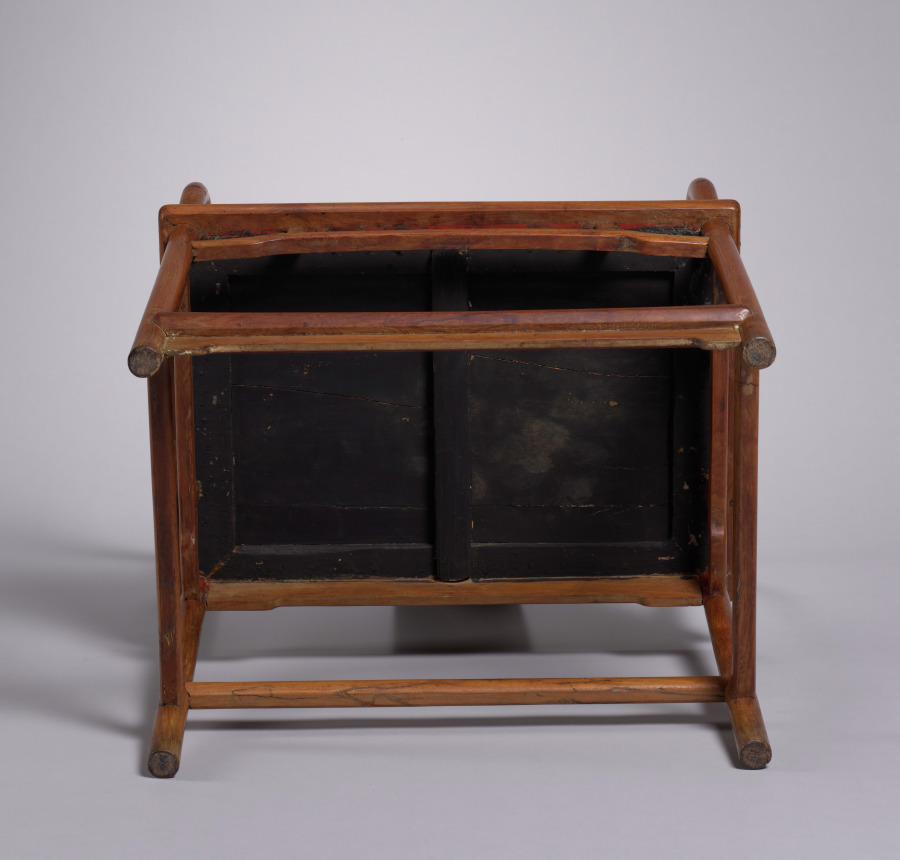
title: Roundback Armchair: Lohan Type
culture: China, Ming dynasty (1368–1644) to Qing dynasty (1644–1911)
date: 1600s–1700s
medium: Rosewood (huanghuali)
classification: Furniture and woodwork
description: In history, China moved from an original floor culture to high chairs and tables, developing a unique tradition of craftsmanship. Although still relatively unexplored, the manufacturing and styles of furniture differ by region. This horseshoe-back armchair was made in Jiangsu province. Its simplicity and minimalist elegance is characteristic of Suzhou-style furniture and aesthetics. The back of the chair is made of seven pieces of wood, joined and secured with an inserted wooden pin, a mortise-tenon technique that appeared in its earliest form in Neolitihic fragments of the Hemudu culture.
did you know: The horseshoe-shaped back of this chair is joined without glue or nails.